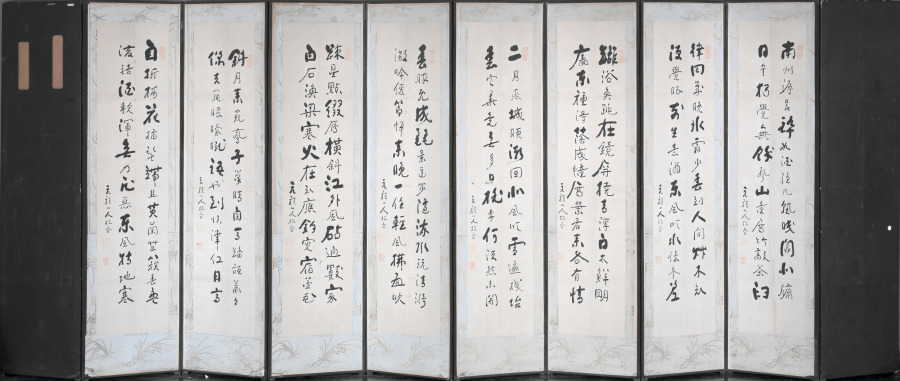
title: Calligraphy (reverse)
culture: Korea, Joseon dynasty (1392–1910)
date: late 1800s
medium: Ten-panel folding screen affixed with album leaves (obverse), calligraphy (reverse), ink and color on silk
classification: Painting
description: The front of this screen features an assortment of subjects: birds and flowers, landscapes, and scenes of everyday life, mostly in monochromatic ink with light colors. The screen’s reverse side conveys a number of classical poems about the fleeting beauty of the four seasons. Traditionally, only one side of a folding screen bears painted or embroidered images, since these were used as a background furnishing. In Korean houses by the 1800s and early 1900s, however, two-sided folding screens became noticeably popular, possibly inspired by Japanese double-sided folding screens, which mainly served as room dividers in Japanese households.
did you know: A calligrapher has brushed several Chinese poems about the four seasons on the reverse side, among them "Composing in the Daytime of Summer" by Tang poet Liu Zongyuan (773–819) and "Composing when Spring Begins" by Song scholar Zhang Shi (1133–1180).